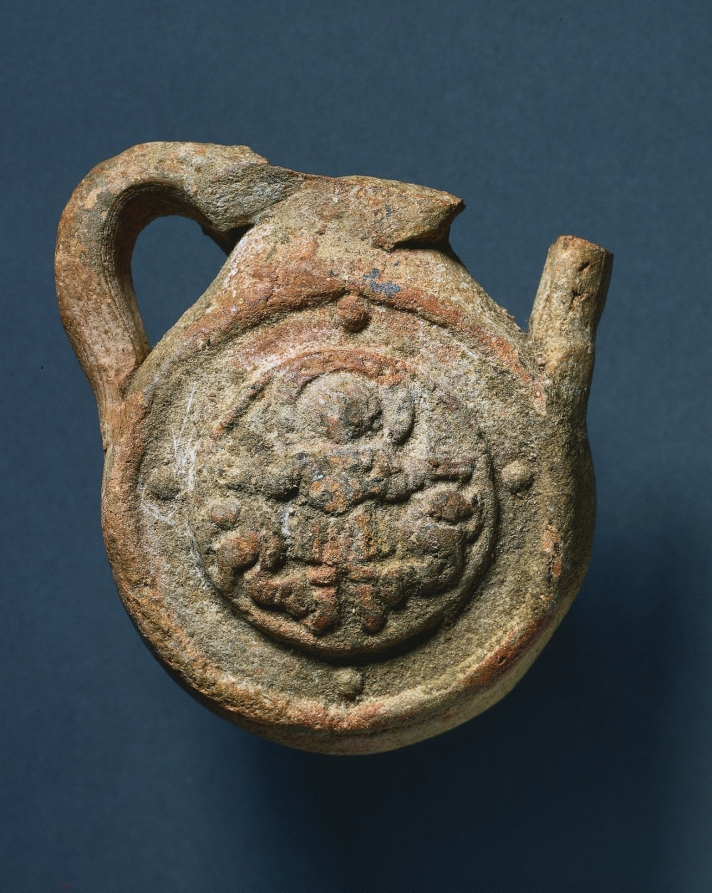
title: Pilgrim's Flask with Saint Menas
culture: Egypt, Coptic period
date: 400–600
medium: terracotta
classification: Ceramic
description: These flasks bear the image of Saint Menas, an early martyr of the Christian Church whose shrine was in the desert southwest of Alexandria in Egypt. These flasks were probably used by pilgrims to hold oil taken from the lamp that burned over this saint's tomb. Probably manufactured near the shrine, pilgrim's flasks often bear decorations hinting at their place of origin, as is the case here.